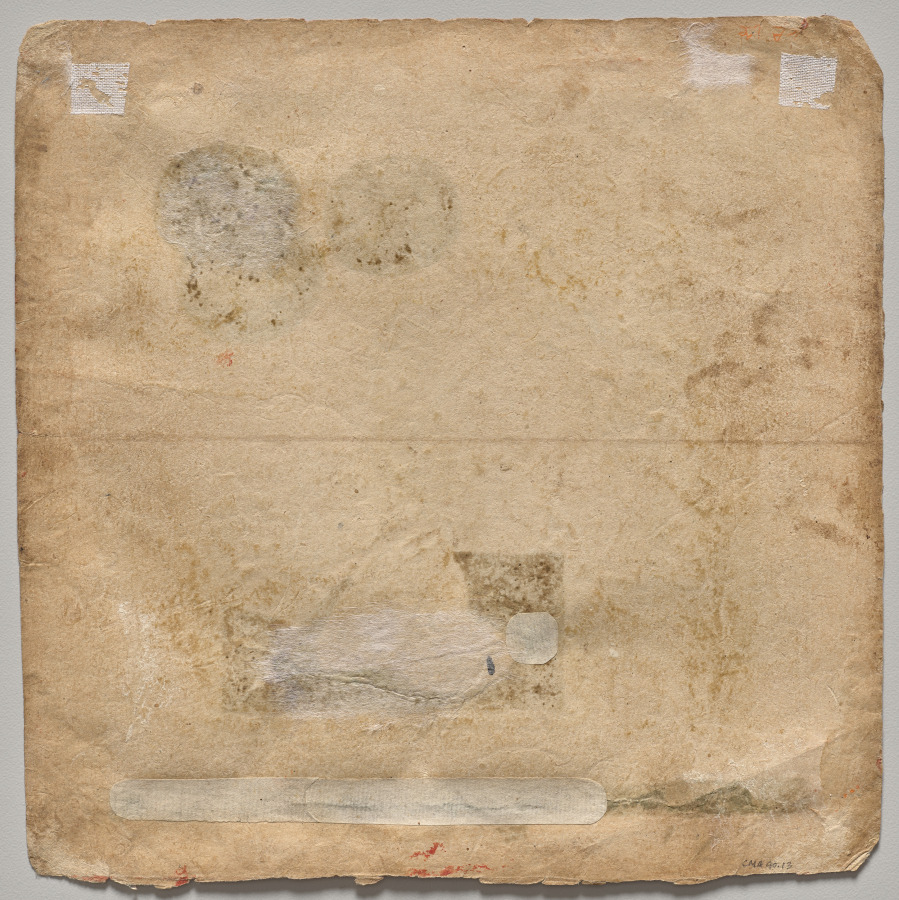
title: Dipak Raga, One of the Thirty-Six Melodies (Ragamala): Personifying Love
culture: Northern India, Himachal Pradesh, Pahari kingdom of Basohli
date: c. 1690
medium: Gum tempera and ink on paper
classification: Painting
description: A nobleman is seated on a carpet, attended by a retainer holding a flywhisk.